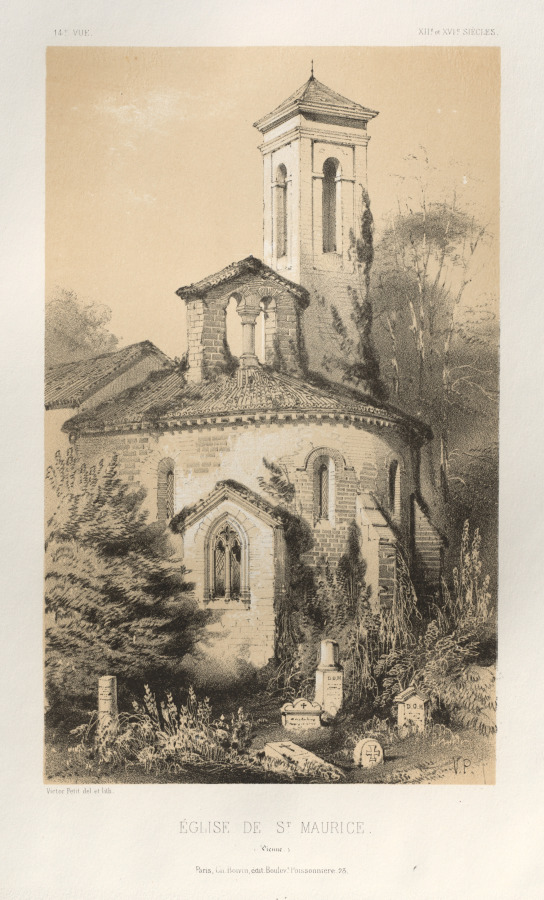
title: Architecture Pittoresque ou Monuments des xveme. Et xvieme. Siecles: Chateaux De France des XV et XVI Siecles: Pl.14, Eglise de St. Maurice (Vienne)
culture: France, 19th century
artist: Victor Petit (French, 1817–1874)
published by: Charles Boivin (publisher and editor); Lith de Godard a Paris (printer)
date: 1860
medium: lithograph with tint stone, from portfolio of 100 lithographs with tint stone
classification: Print